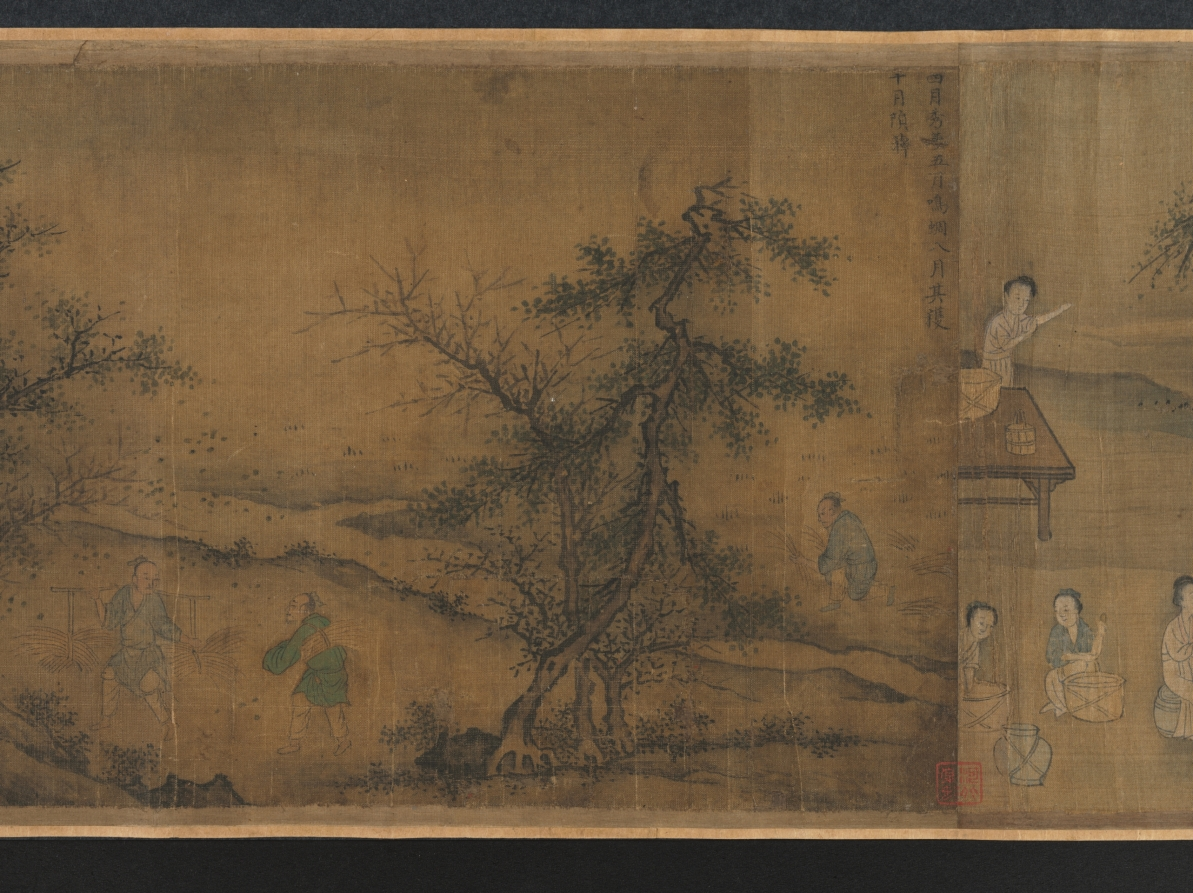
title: "Seventh Month" from the Odes of Bin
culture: China, Southern Song dynasty (1127-1279)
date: 1200s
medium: Handscroll; ink and color on silk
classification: Painting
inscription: Colophons: 1. [on the frontispiece] by the Qianlong emperor (dated 1741). 2. by Lu Wan (dated Zhengde dingchou, 1517). 2. by the Jiaqing emperor (dated 1807).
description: According to Confucian thought, the ruler looks after the well-being of his people which involves agricultural activities. Seventh Month from the ancient Odes of Bin in the Shijing (Book of Poetry) describes occupations throughout the year, including plowing, harvesting, hunting, making clothes, and observing rituals. The earliest illustrations of these Odes accompanied by text were commissioned by Southern Song emperor Gaozong (reigned 1127–1162). As the lower Yangzi delta had become the new seat of government, Gaozong had sets of these illustrations produced by court artists to revive the dynasty and convince the Confucian officialelite of his legitimacy to rule.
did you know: The Odes of Bin appears in the classic Shijing (Book of Poetry), an anthology of more than 300 poems, folk songs, and ceremonial hymns that were originally chanted to music.